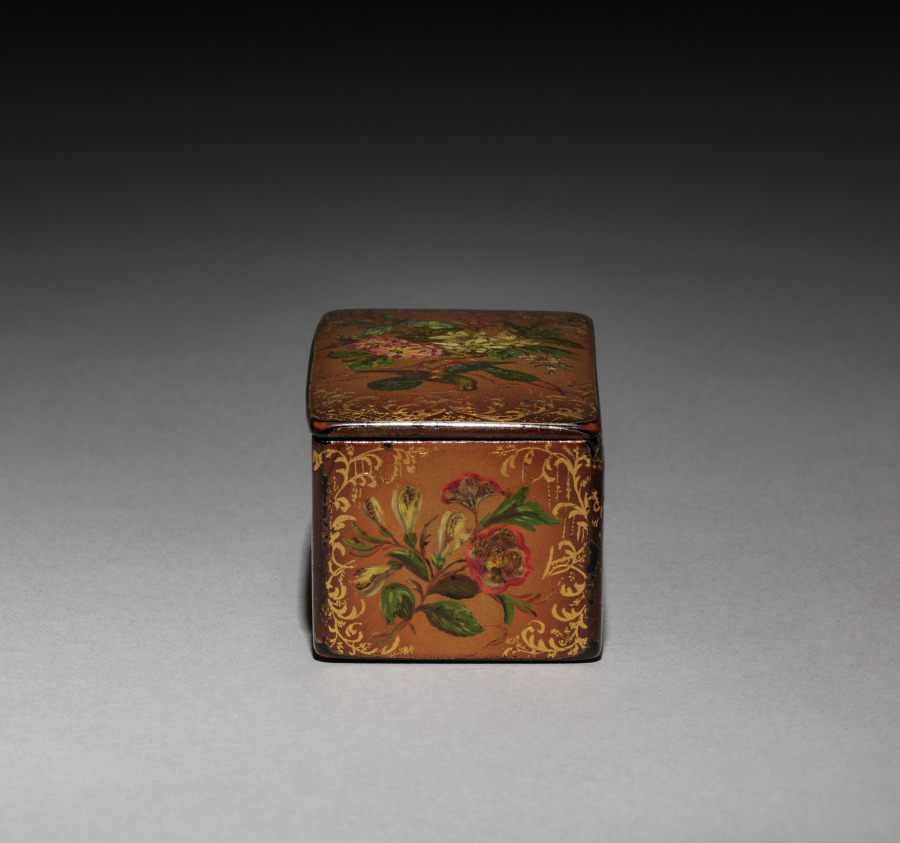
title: Box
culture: Russia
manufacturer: Lukutin Factory (Russian, 1818–1904)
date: 1830–81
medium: lacquered wood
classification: Miscellaneous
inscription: inscription on interior.